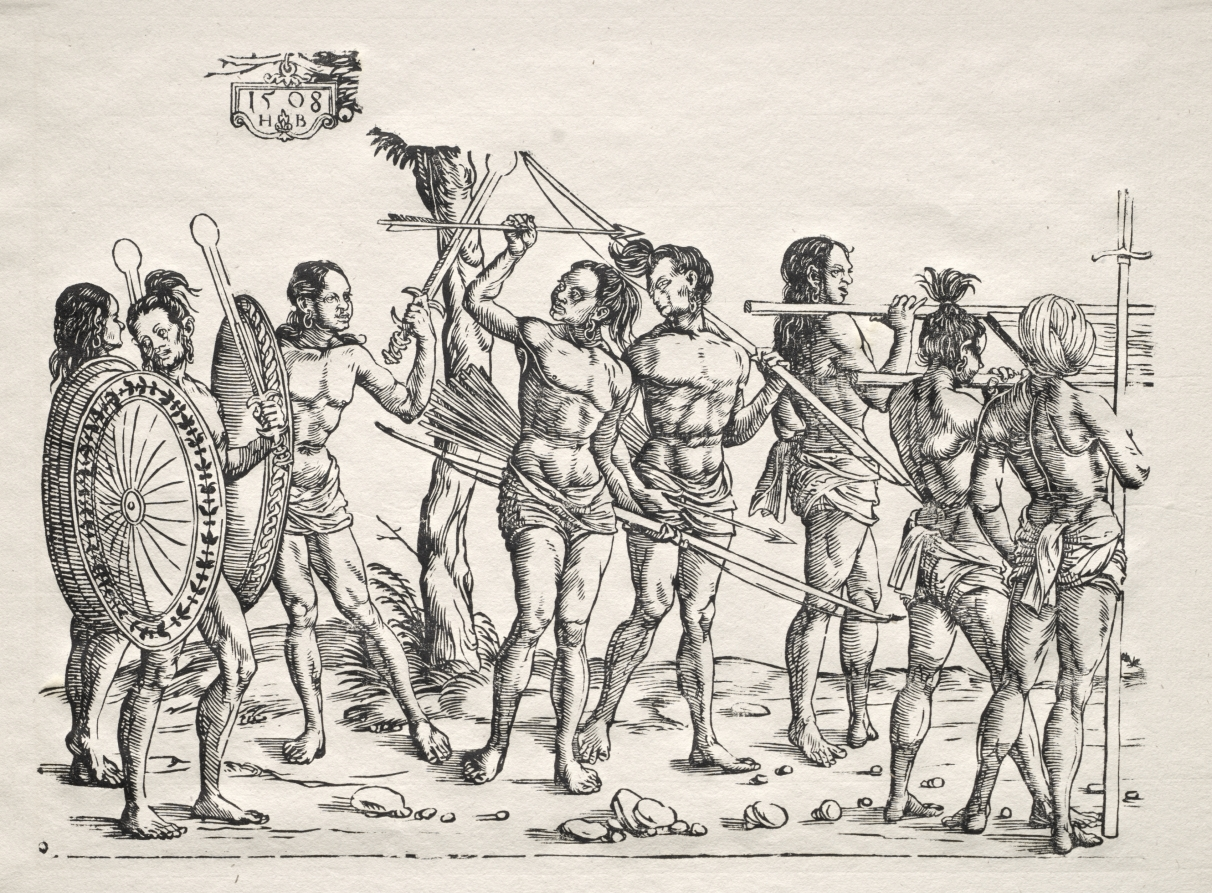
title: The King of Cochin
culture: Germany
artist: Hans Burgkmair (German, 1473–1531)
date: 1508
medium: woodcut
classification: Print